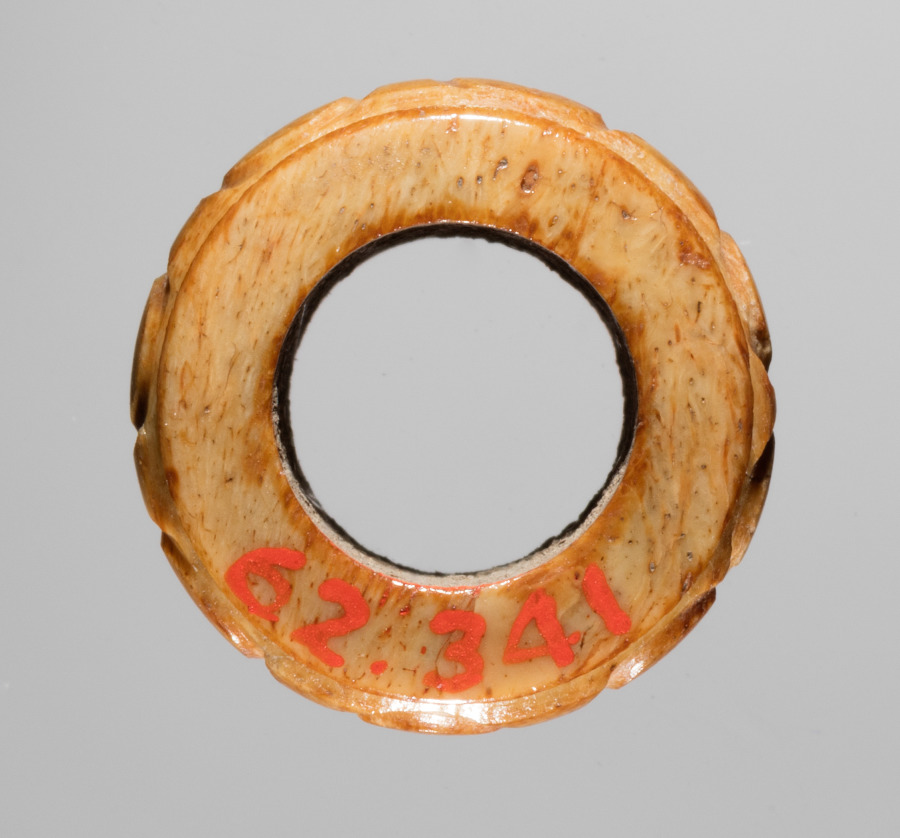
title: Spindle Whorl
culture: Iran, early Islamic period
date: 700s - 900s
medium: bone, incised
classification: Spindle Whorl